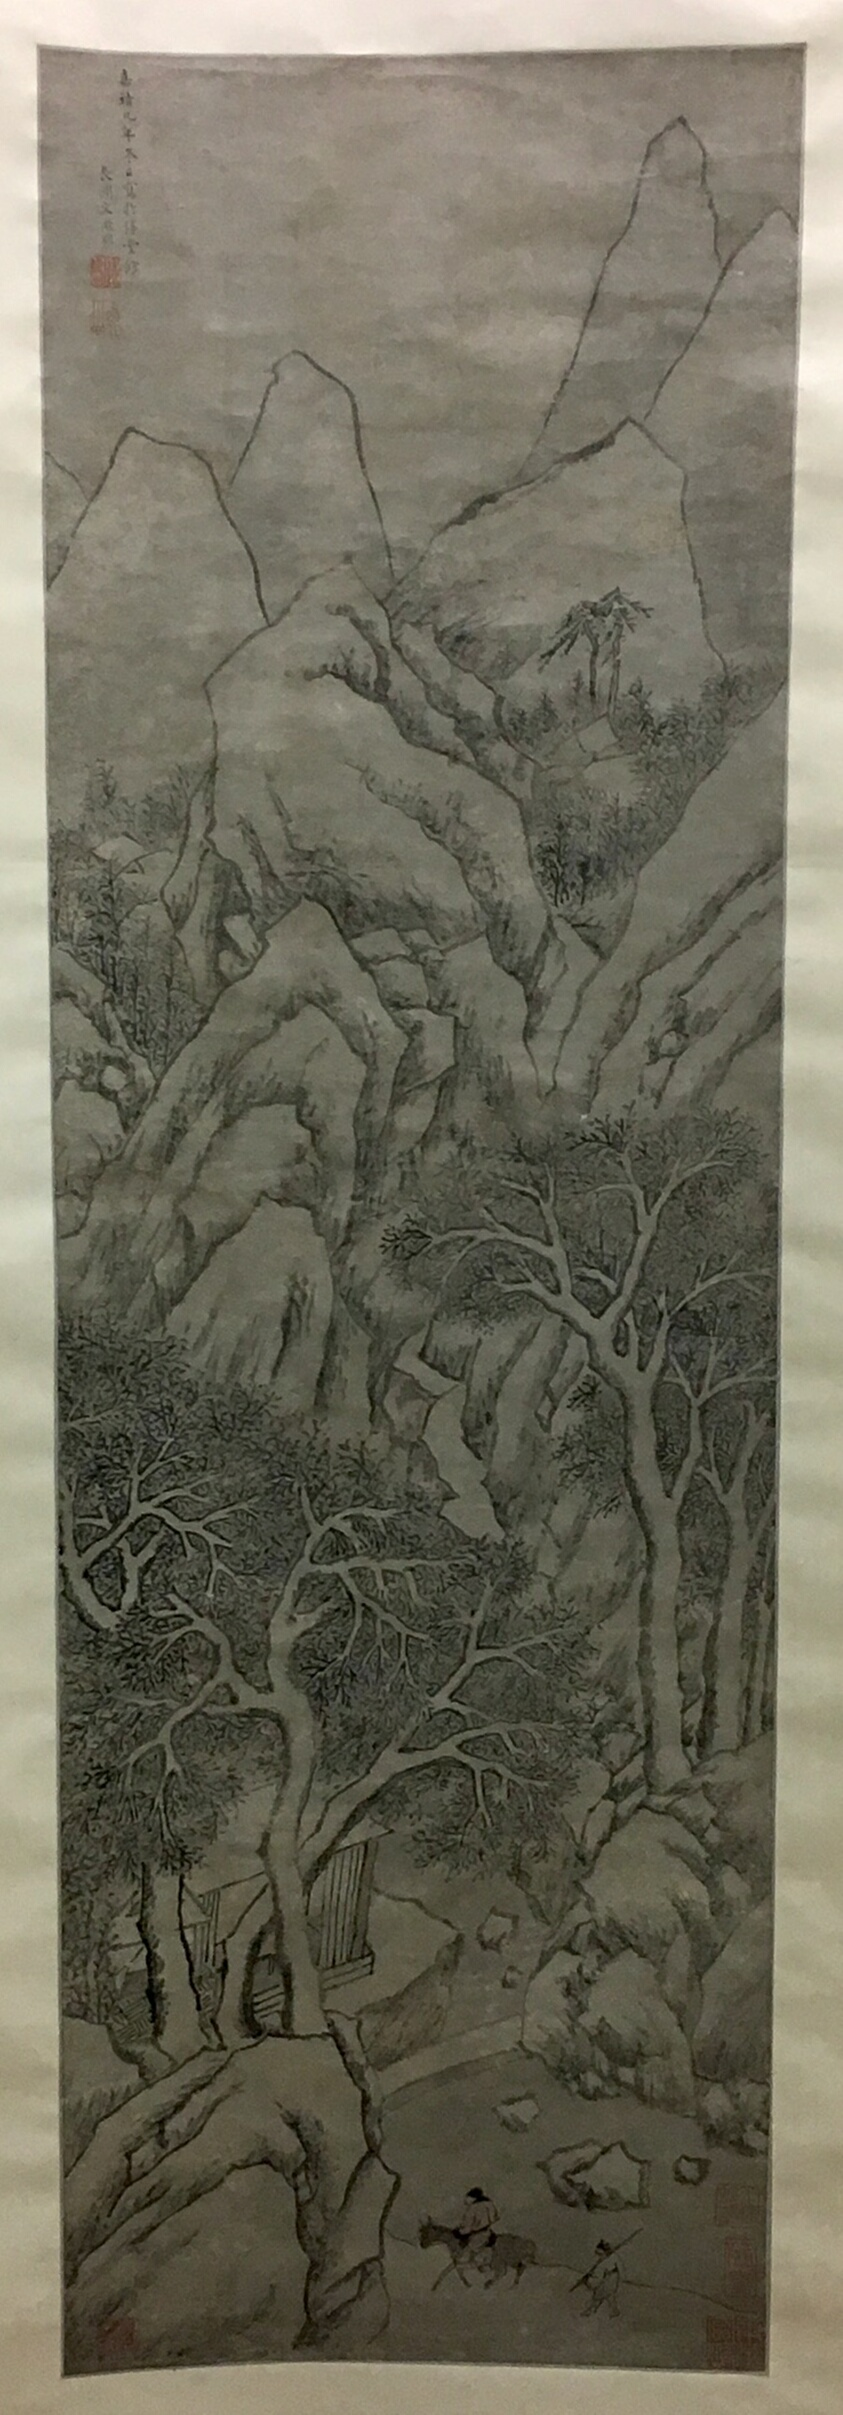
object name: Painting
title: Snowy Landscape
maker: Wen Zhengming (Chinese, 1470-1559)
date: Ming Dynasty (1368–1644);1470–1559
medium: Hanging scroll; Ink and light color on paper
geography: China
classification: hanging scroll; painting; asian art